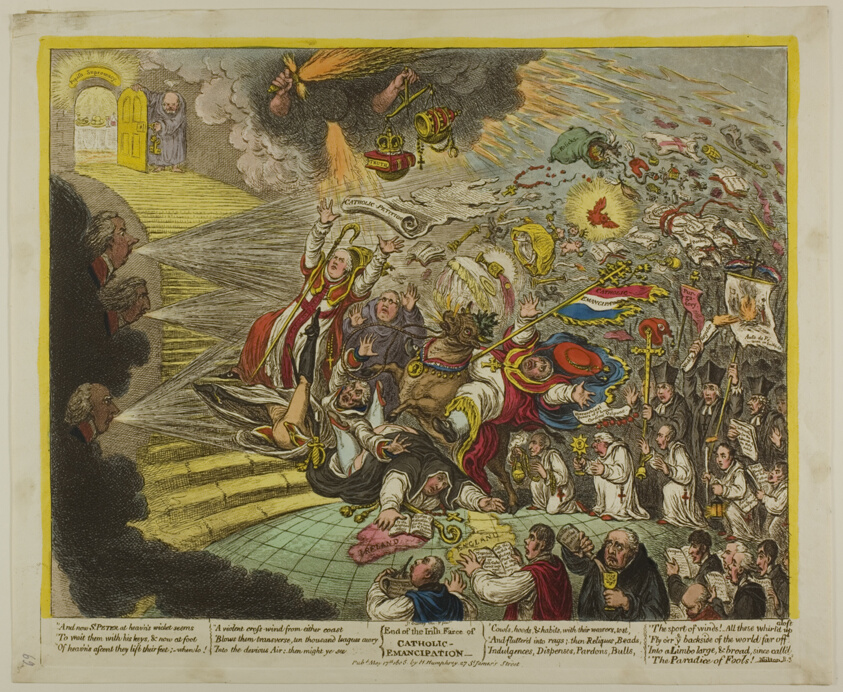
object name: Print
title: End of the Irish Farce of Catholic Emancipation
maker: James Gillray (English, 1756-1815); published by Hannah Humphrey (English, c. 1745-1818)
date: published May 17, 1805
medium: Hand-colored etching on paper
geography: England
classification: aquatint; print; prints and drawing